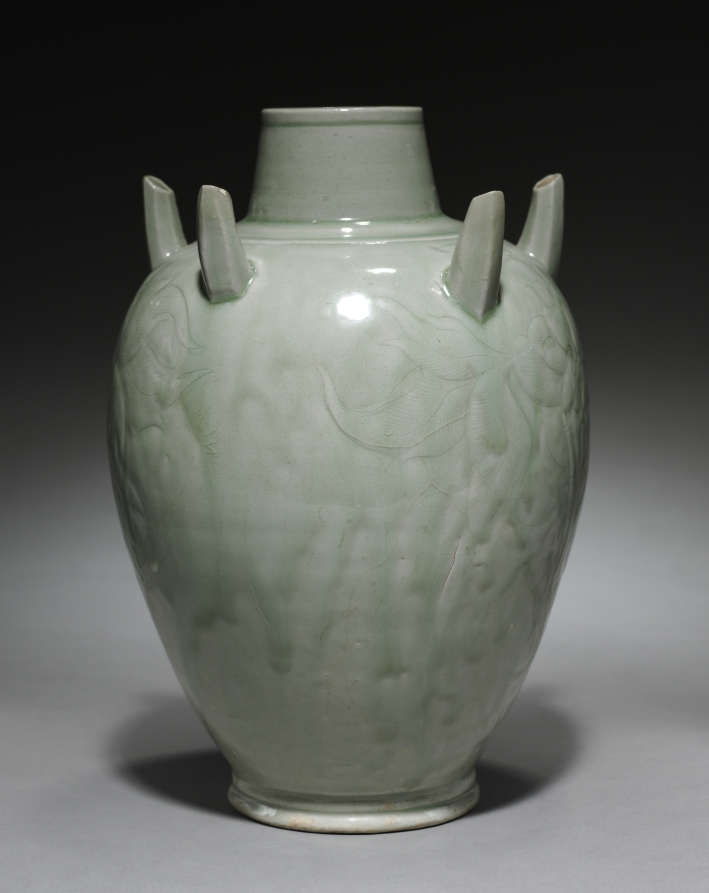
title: Vase with Peonies and Five Spouts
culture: China, Zhejiang province, Hangzhou, Southern Song dynasty (1127-1279)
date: 900s–1000s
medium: green-glazed porcelaneous stoneware with incised decoration, Yue ware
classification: Ceramic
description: "In full autumn wind and dew the kilns of Yue open; And a thousand peaks are despoiled of their halcyon green" (translated by S. W. Bushell). These 9th-century poetic lines glorify the highly prized green-glazed Yue wares of the Tang period. This later example has a pale green glaze that is glassy and consistent, which indicates a precise control of the glaze components as well the kiln atmosphere by reducing the amount of oxygen at some stage during the firing.